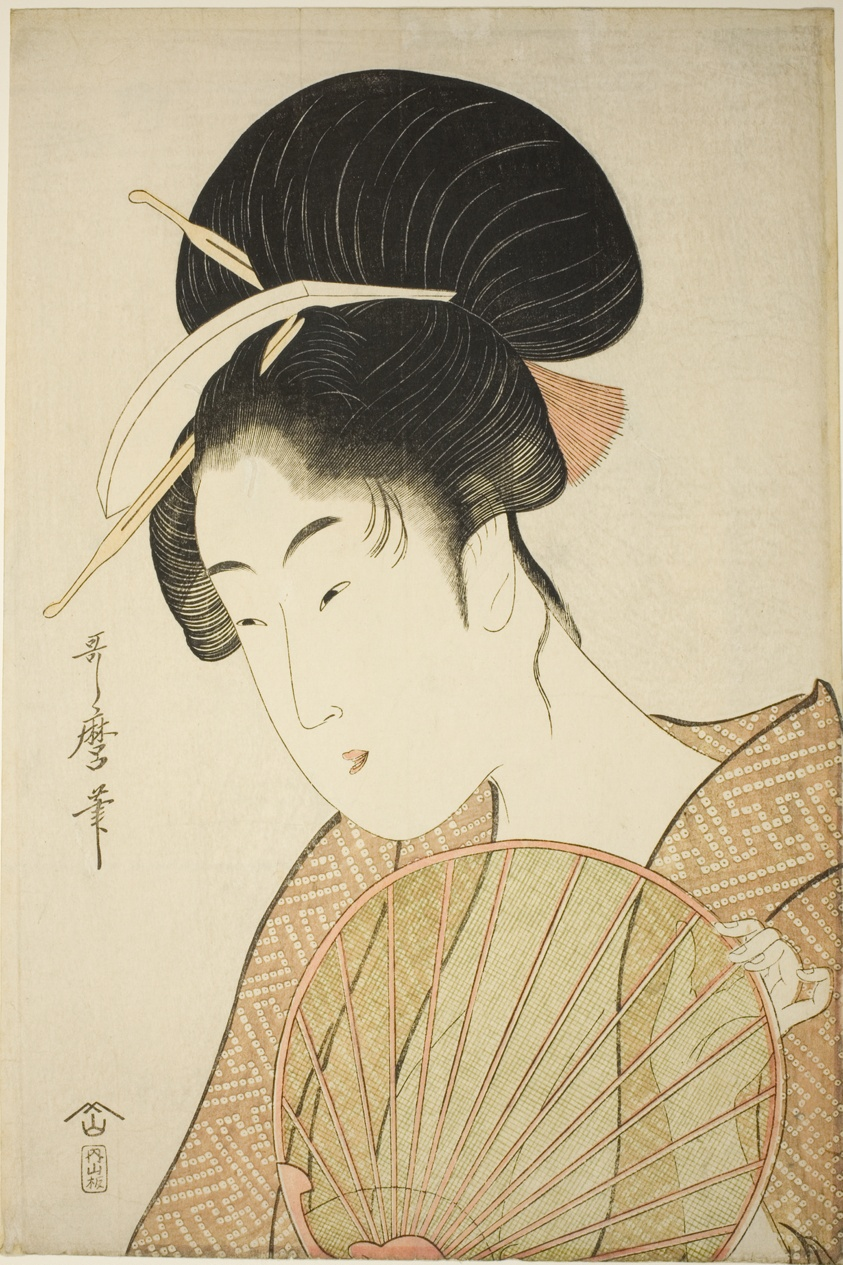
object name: Print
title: Woman Holding a Round Fan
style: Japanese (culture or style)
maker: Kitagawa Utamaro 喜多川 歌麿; Japanese, 1753 (?)-1806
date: c. 1797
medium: Color woodblock print; oban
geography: Japan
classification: woodblock print; print; asian art